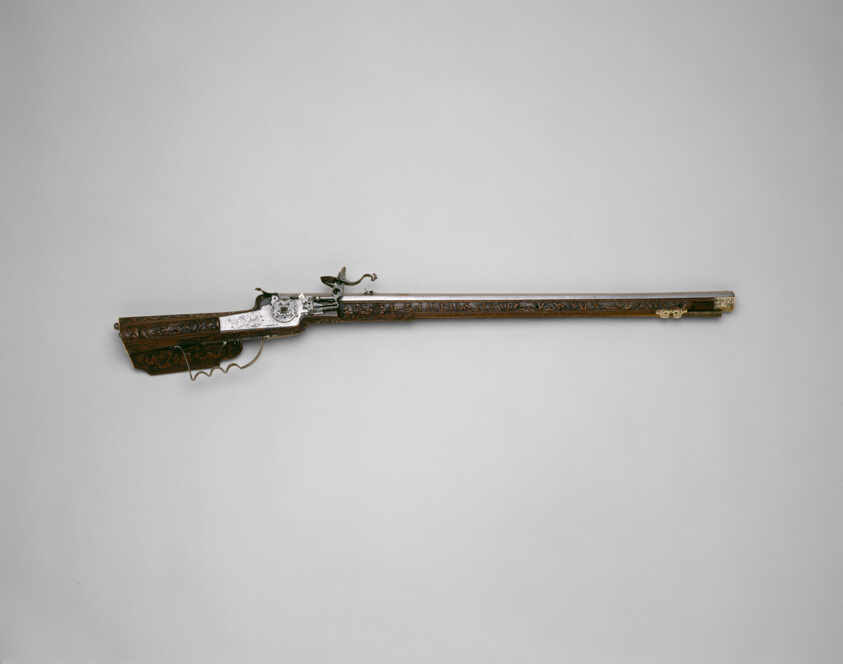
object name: Arms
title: Wheellock Rifle of Emperor Leopold I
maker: Stock: Johann Georg Maucher; German, Schwäbisch Gmünd, active 1650-1700; Lock and barrel: Michael Has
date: 1664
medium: Steel, brass, cherrywood, horn, staghorn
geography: Gmünd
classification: firearm-long gun; arms; arms and armor